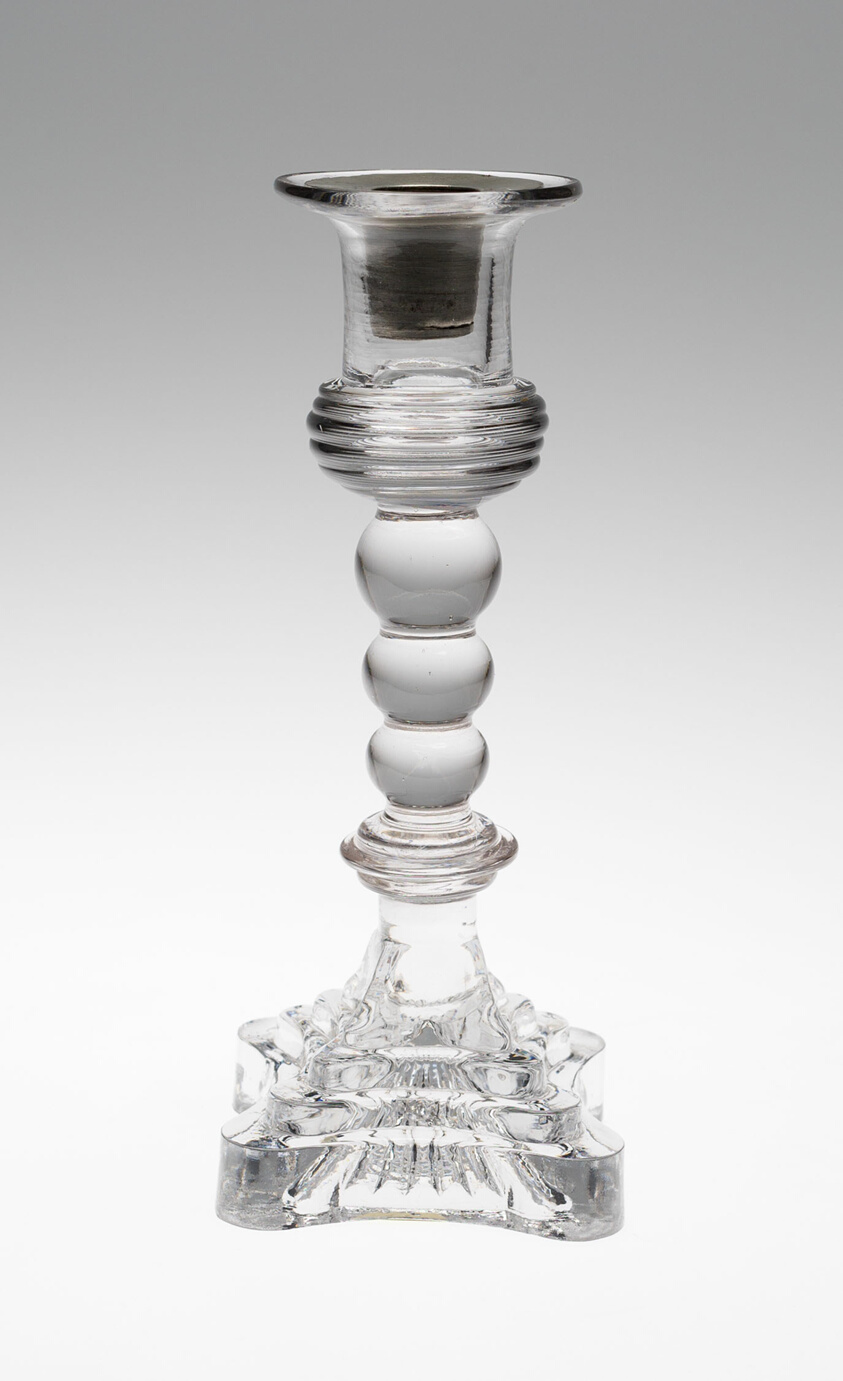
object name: Glass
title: Pair of Candlesticks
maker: Artist unknown (American, 19th century); Pittsburgh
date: 1830–40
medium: Pressed and blown glass, pewter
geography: Pittsburgh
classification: candleholder - candlestick; glass; american decorative arts; american arts; decorative arts